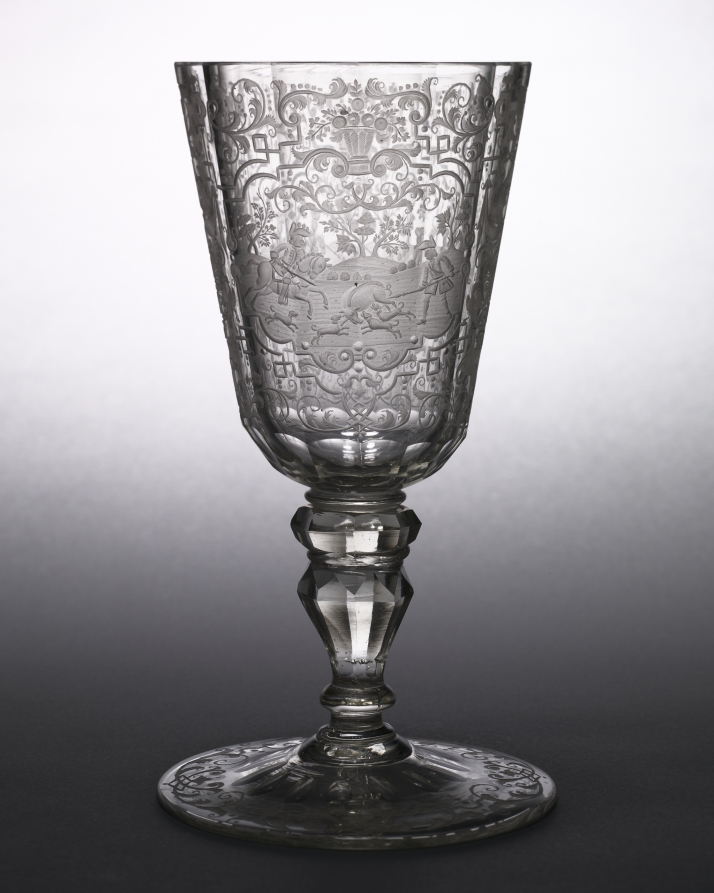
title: Cup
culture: Bohemia, 18th century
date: c. 1720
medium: glass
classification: Glass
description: This substantial drinking vessel was used for a variety of alcoholic beverages. Bohemian glass gained immense popularity throughout Europe’s courts in the late 1600s and early 1700s. Bohemia (present-day Czech Republic) had abundant natural resources, including potassium-rich minerals that, when combined with chalk, created clear glass that was remarkable for its stability. Glassmakers from the region became experts at hand cutting and engraving glassware, as in this example featuring a boar hunt amid elaborate ribbonlike motifs, or strapwork, and floral designs.